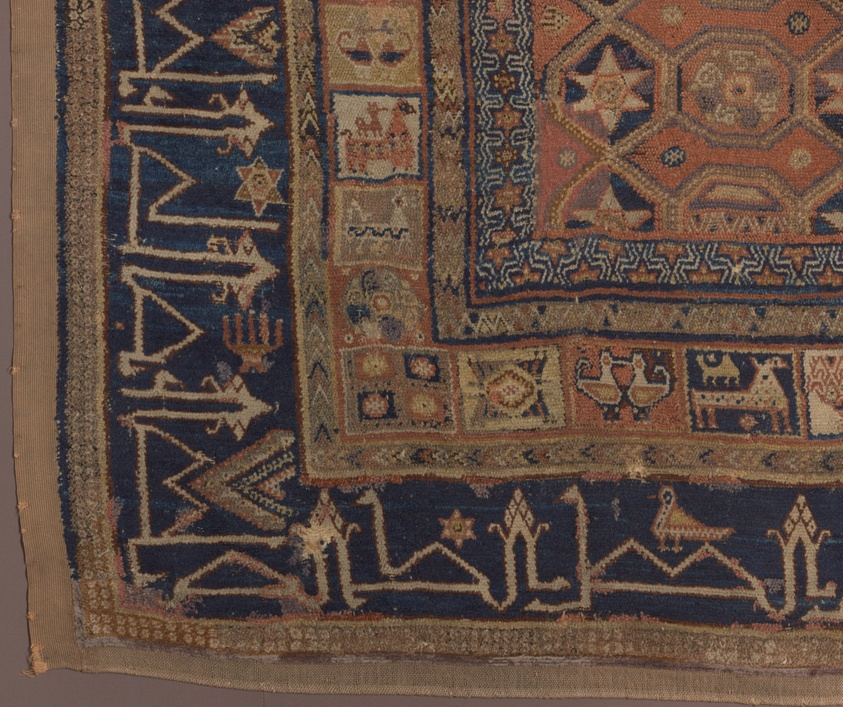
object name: Textile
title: Carpet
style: hispano-moresque, medieval, european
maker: Hispano-Moresque; Spain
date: Before 1473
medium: Wool, plain weave with supplementary wefts forming cut pile through a technique known as "Spanish knots"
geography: Spain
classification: weaving - carpet; textile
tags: geometric motif, abstract figures, animals, birds, cross motif, script, stars